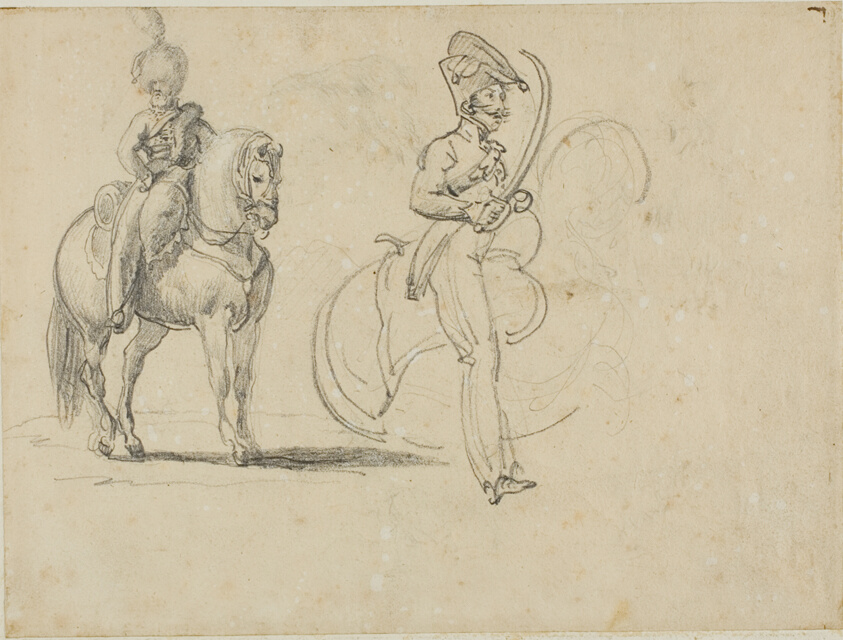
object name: Drawing and Watercolor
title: Sketches of a Mounted Chasseru and a Cavalry Officer with Drawn Saber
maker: Jean Louis André Théodore Géricault (French, 1791-1824)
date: 1813/14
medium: Graphite on cream wove paper, perimeter mounted on ivory laid paper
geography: France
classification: drawings (visual works); prints and drawing